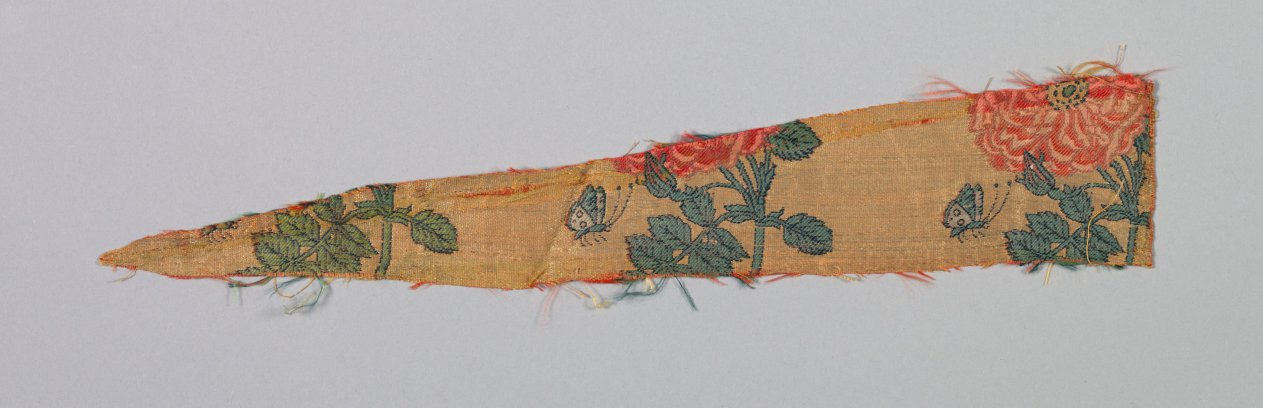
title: Fragment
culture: Iran, early 17th century (period of Shah Abbas)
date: early 1600s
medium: compound tabby ground with diasper pattern, brocaded; silk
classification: Textile